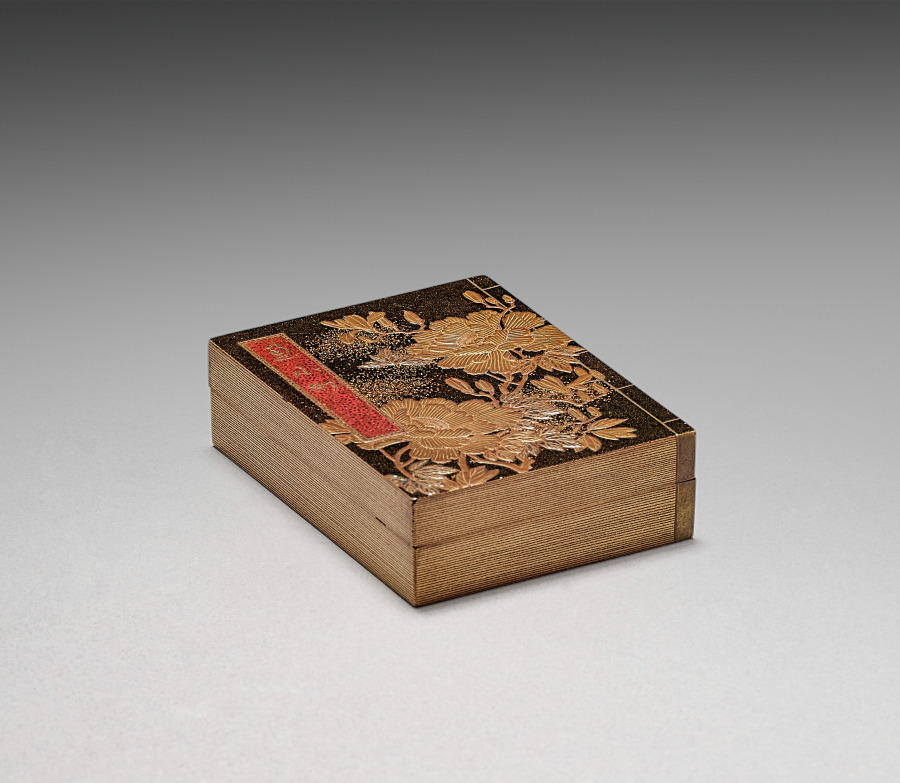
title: Nested Boxes with Chrysanthemums (inner box)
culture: Japan, Meiji period (1868–1912)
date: early 1900s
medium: lacquer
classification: Lacquer